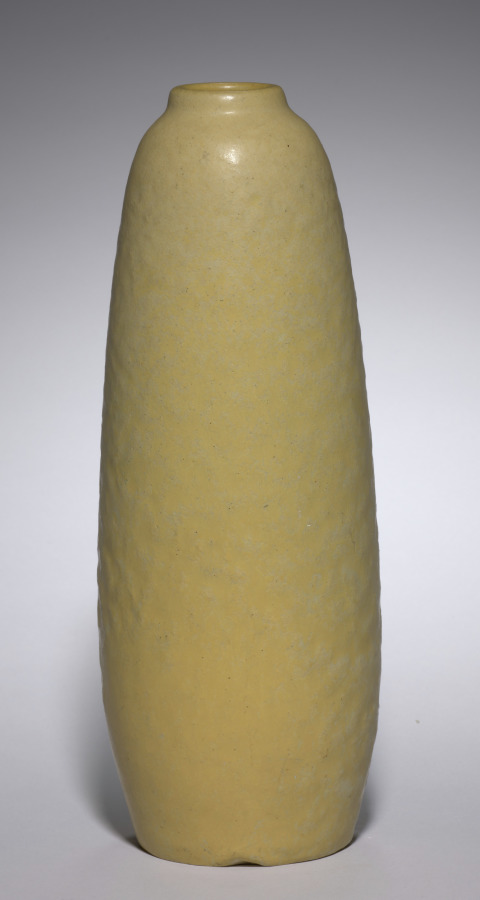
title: Vase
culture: America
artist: firm of Artus Van Briggle (American, 1869–1904)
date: 1905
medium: earthenware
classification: Ceramic